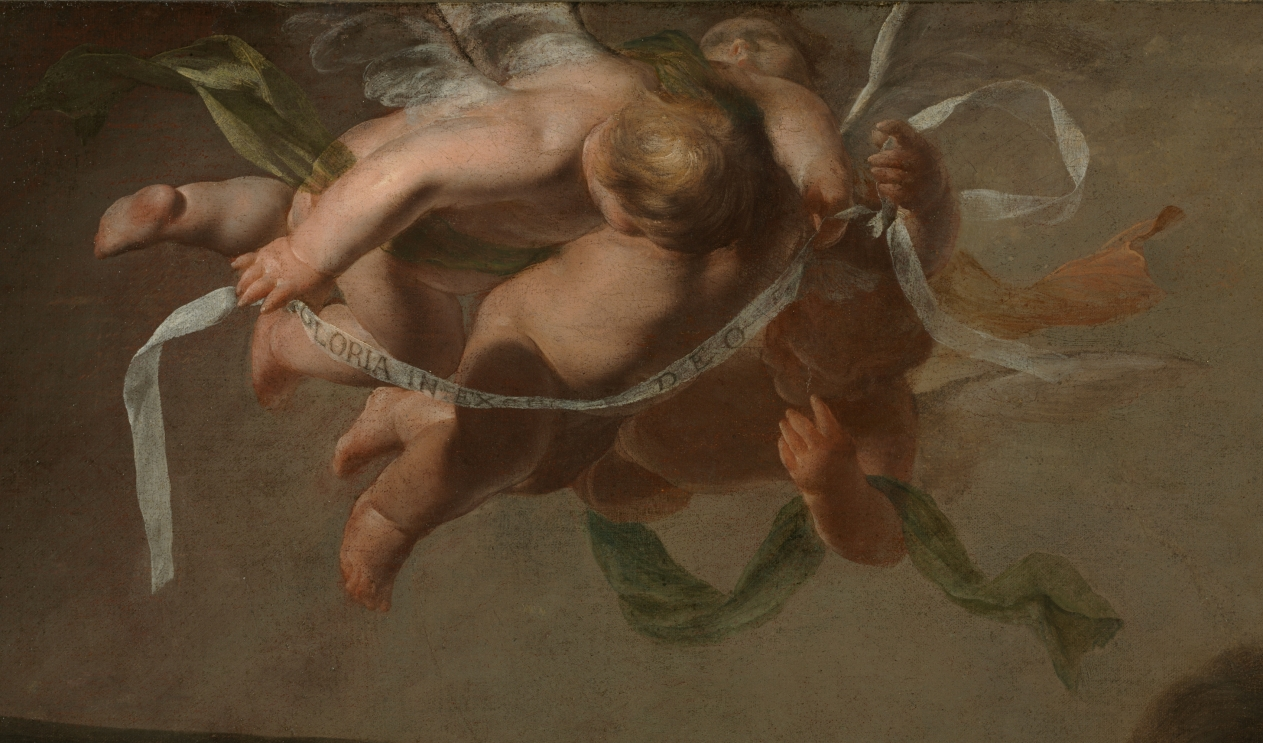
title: Adoration of the Shepherds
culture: Italy, 17th century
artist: Bernardo Cavallino (Italian, 1616–1656)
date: c. 1650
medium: oil on canvas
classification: Painting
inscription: Signed left on ox: "BC [monogram]"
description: Cavallino worked in Naples where he was not well known during his lifetime, but was alert to the work of contemporaries whose innovations he transformed with extraordinary delicacy and charm. The adoration of the shepherds is a traditional subject, but here Cavallino shows it in a new light. The focus is on Mary, indicating that she alone is aware of the angels who flutter above with ribbons proclaiming Gloria in Excelsis Deo (Glory to God in the highest). Joseph and the shepherds stolidly regard the child, but the sweetness of Mary's expression simultaneously reveals her love, pride, and humility.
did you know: The artist signed this painting with his monogram “BC” on the rump of the ox.